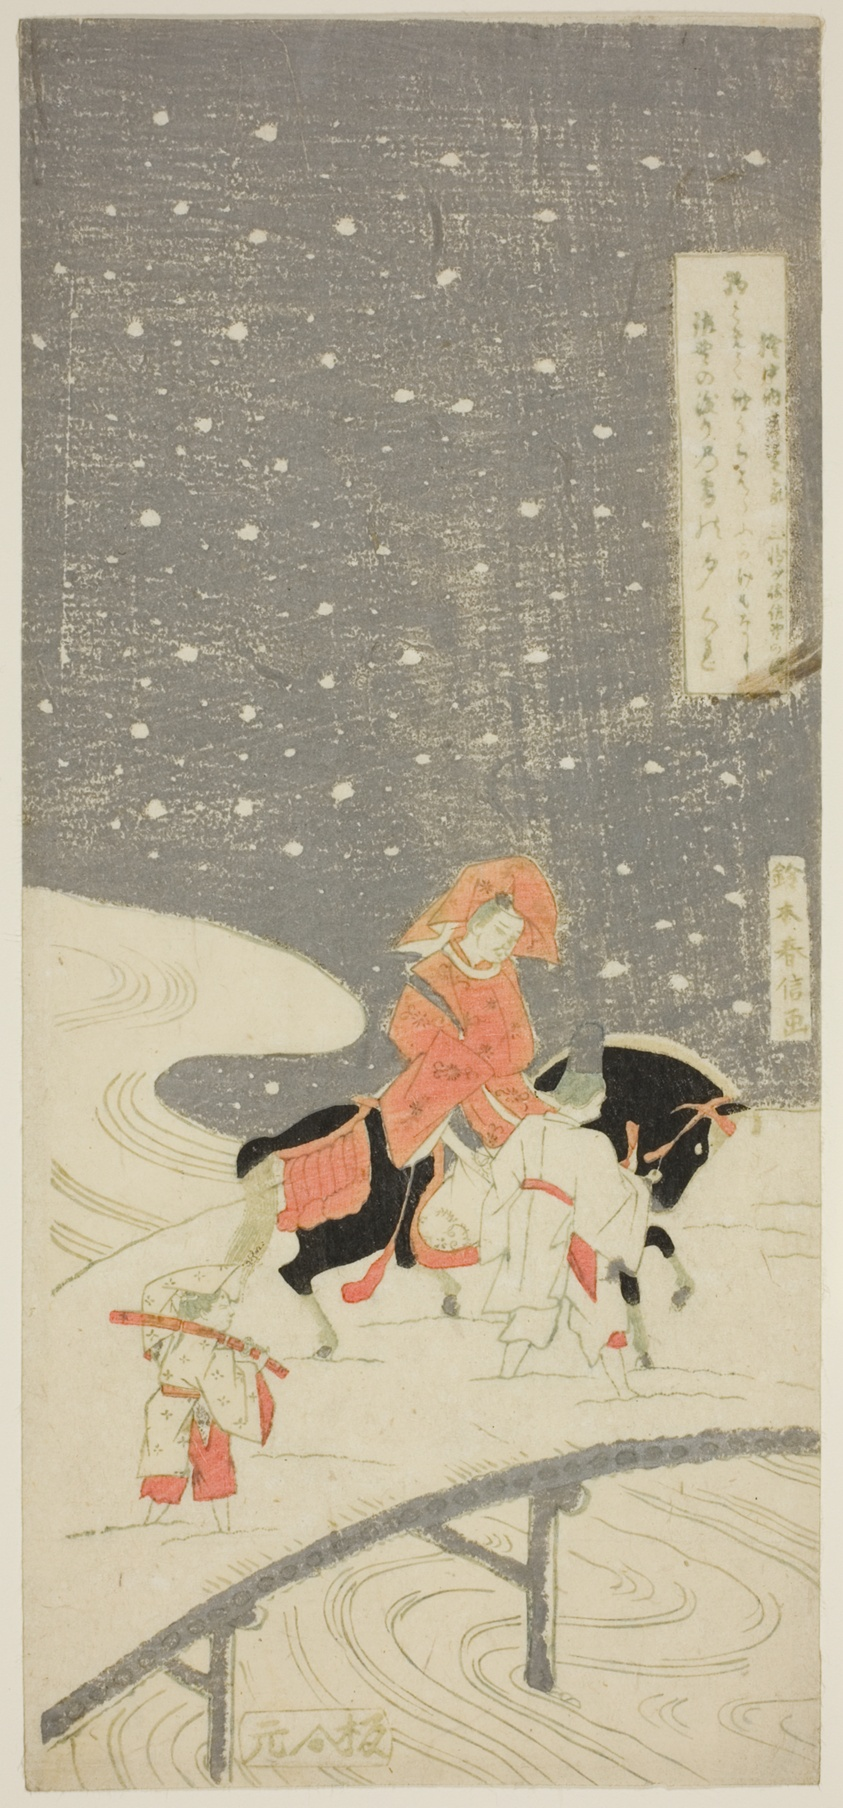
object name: Print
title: Sano Crossing at Miwagasaki (Miwagasaki Sano no watari)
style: Japanese (culture or style)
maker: Suzuki Harunobu 鈴木 春信; Japanese, 1725 (?)-1770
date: 1760s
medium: Color woodblock print; hosoban, mizu-e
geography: Japan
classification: woodblock print; print; asian art